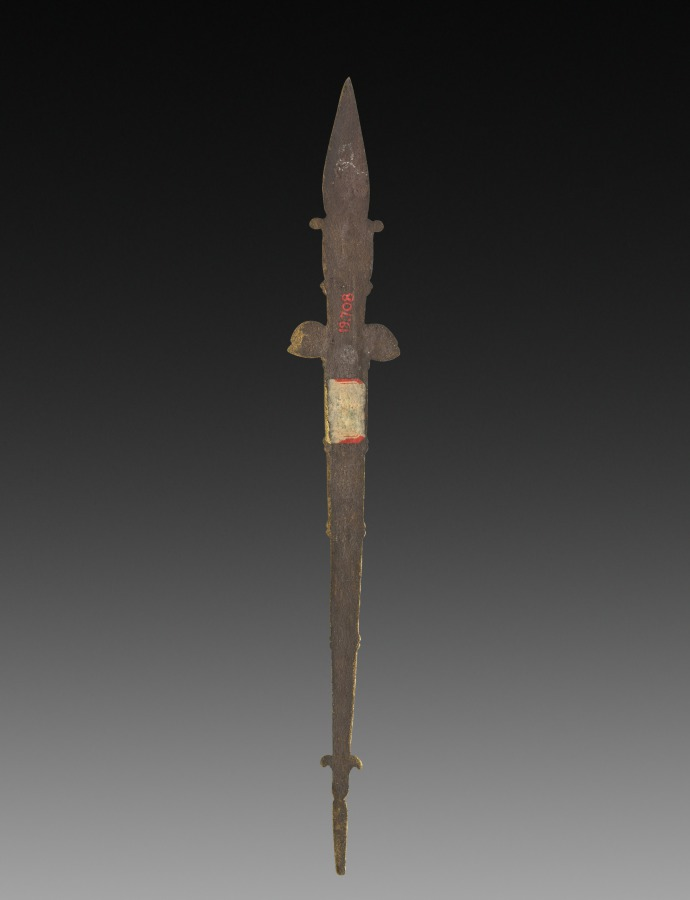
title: Ornamental Detail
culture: France, 18th century, Period of Louis XVI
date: 1775–1799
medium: gilt bronze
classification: Metalwork